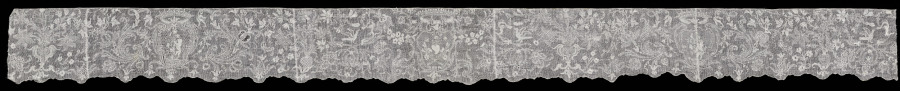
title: Lace Flounce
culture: Belgium, Dinant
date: 1700s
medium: Linen: needle lace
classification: Lace